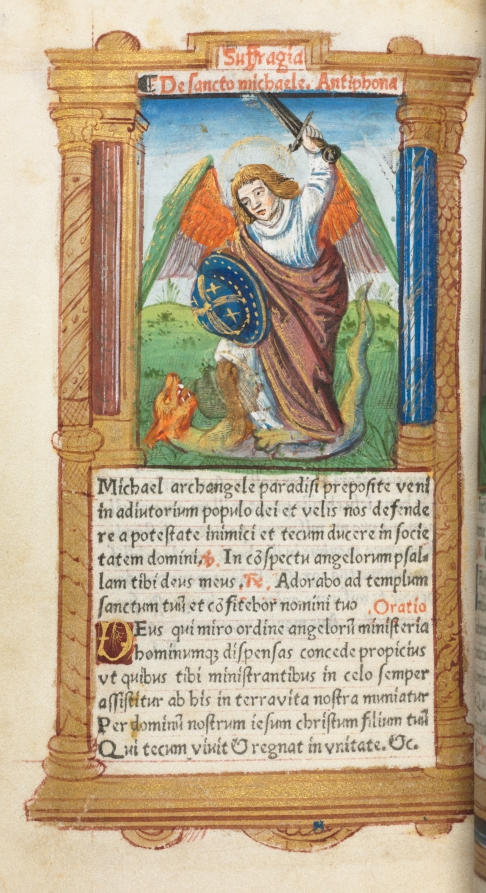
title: Printed Book of Hours (Use of Rome): fol. 97v, St. Michael the Archangel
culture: France, Paris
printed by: Guillaume Le Rouge (French, Paris, active 1493–1517)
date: 1510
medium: 112 Printed folios on parchment, bound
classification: Bound Volume